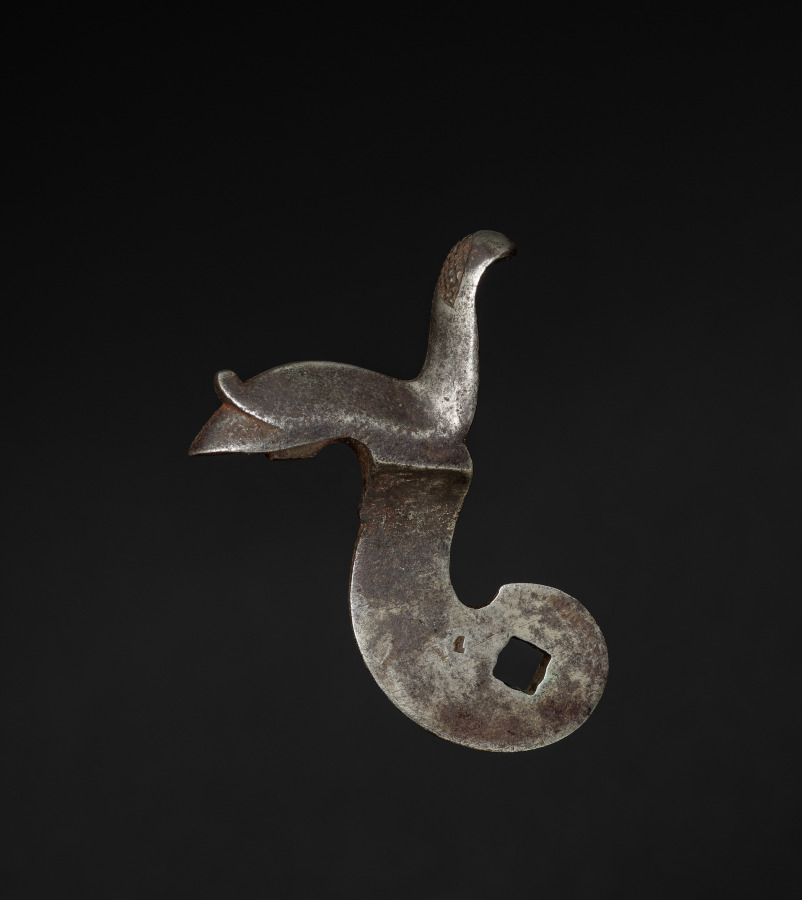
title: Gun-Lock Hammer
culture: England, early 19th century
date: early 1800s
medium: steel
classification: Arms and Armor